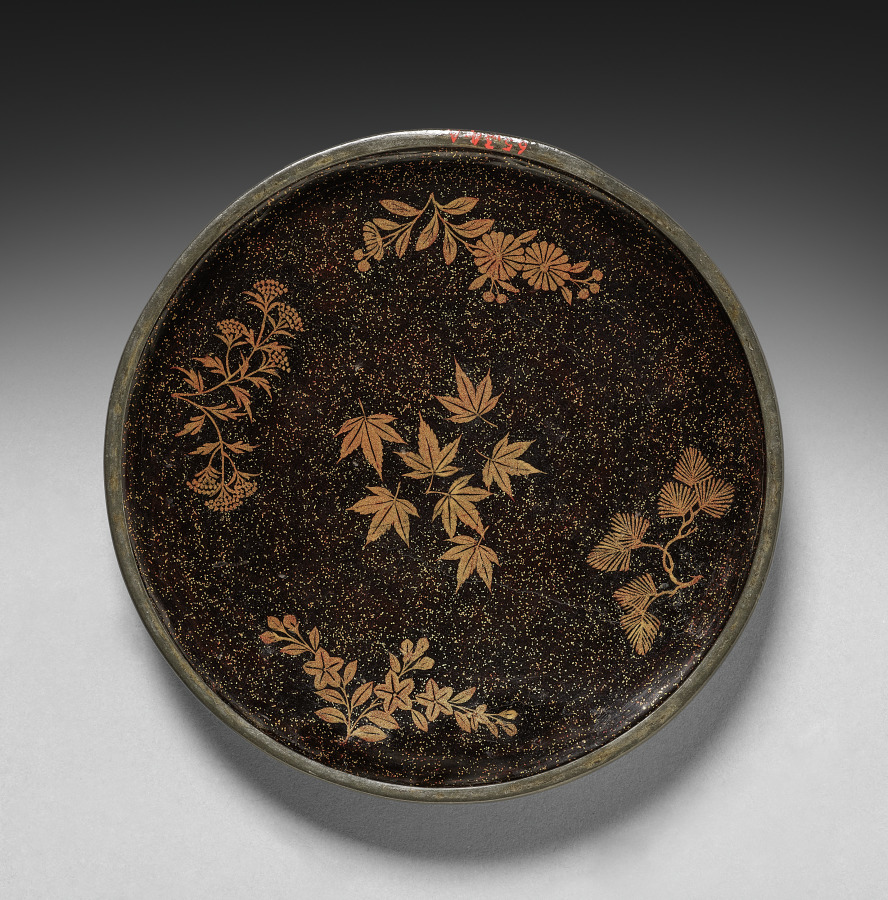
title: Mirror Container with Design of Maple Tree and Autumn Shower (lid)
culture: Japan, Muromachi period (1392–1573)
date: 1400s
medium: lacquer on wood with decoration in maki-e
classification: Lacquer